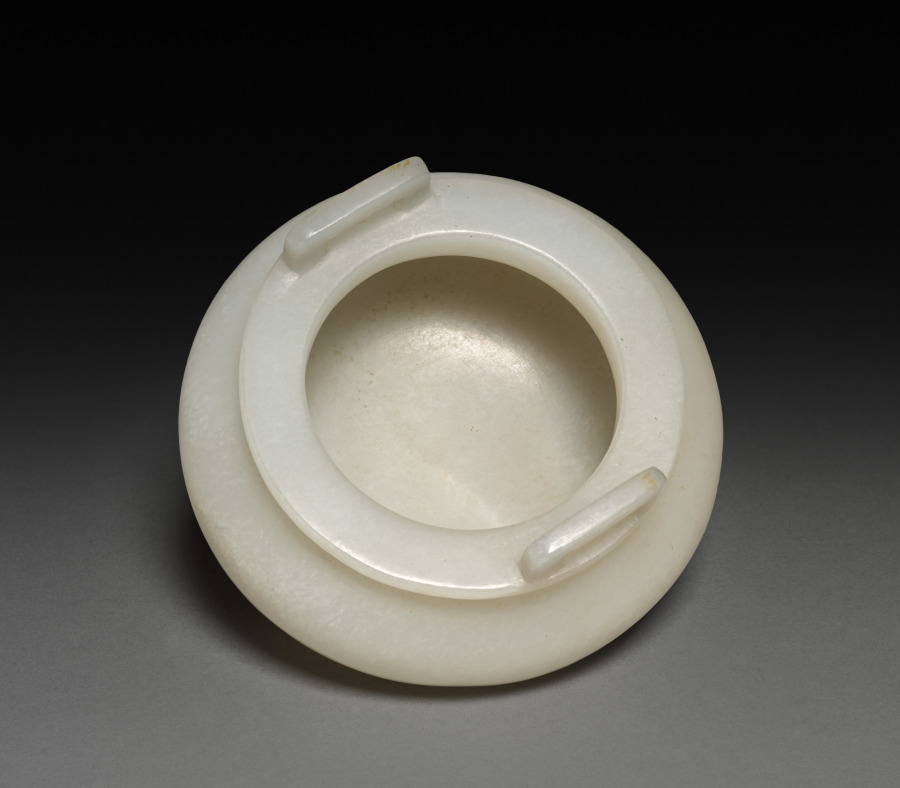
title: Tripod Incense Burner, Ding Shape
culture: China, Qing dynasty (1644-1911)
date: 1644–1911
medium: jade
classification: Jade